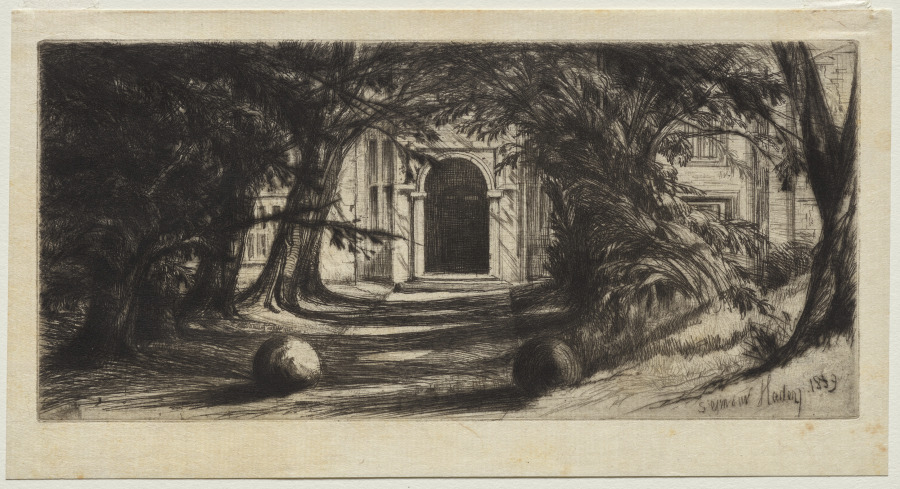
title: Mytton Hall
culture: England, 19th century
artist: Francis Seymour Haden (British, 1818–1910)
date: 1869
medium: etching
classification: Print